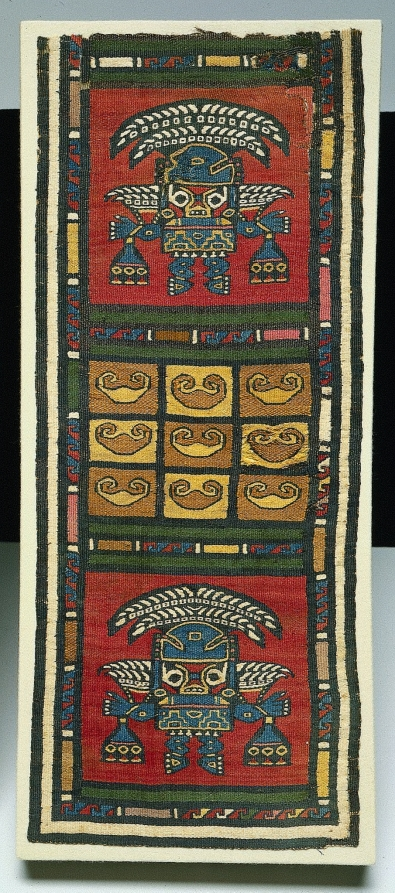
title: Tapestry Fragment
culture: Peru, North Coast, Lambayeque (Sicán) people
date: 700–1370s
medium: camelid fiber and cotton, tapestry weave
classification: Tapestry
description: The prominent figure with an elaborate headdress duplicated on this brightly colored fragment is known today as a “Lord,” a term that reveals uncertainty about his identity but confidence in his prestige. Whether a king or a deity, he was crucially important to the north coast Lambayeque (lahm-buy-yek-kay) (Sicán) people, who often portrayed him in a wide range of media. The geometric motif that repeats in the nine central squares is unidentified.